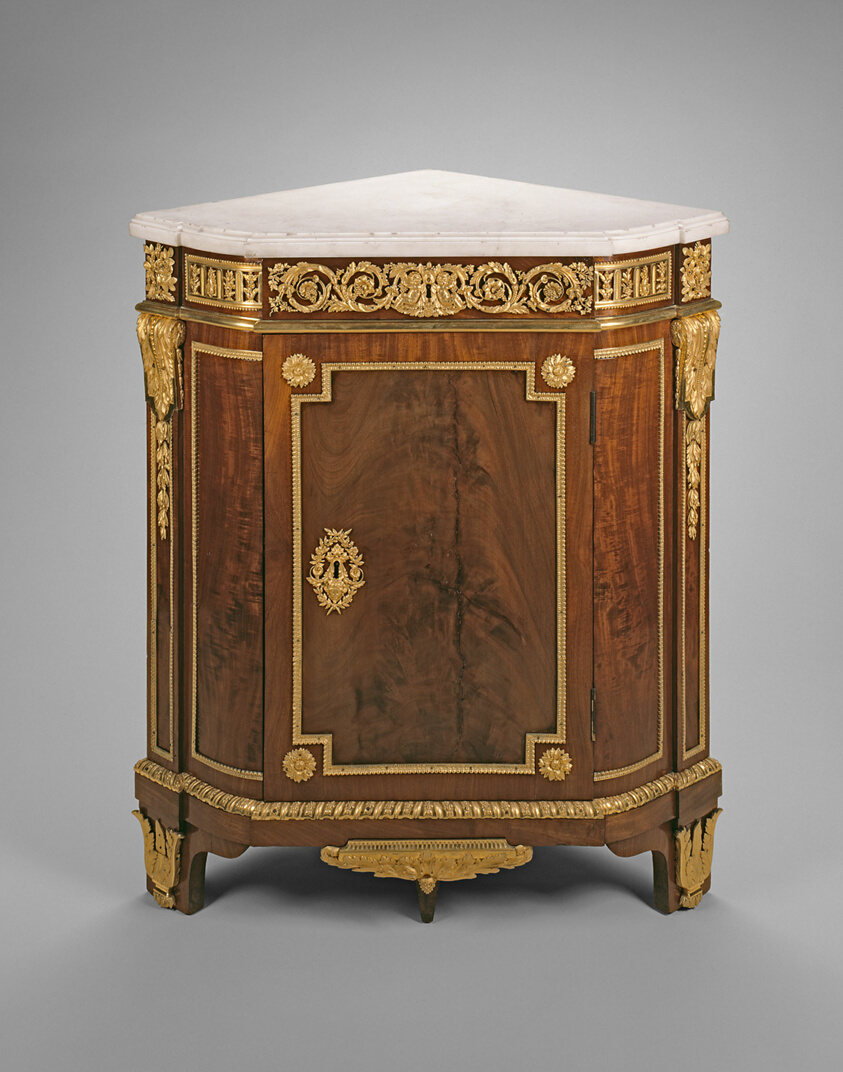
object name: Furniture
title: Corner Cabinet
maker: Jean Henri Riesener; French, born Germany, 1734–1806; Paris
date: c. 1785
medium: Oak, mahogany, marble, and gilt-bronze mounts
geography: France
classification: case furniture; furniture; european decorative arts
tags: furniture